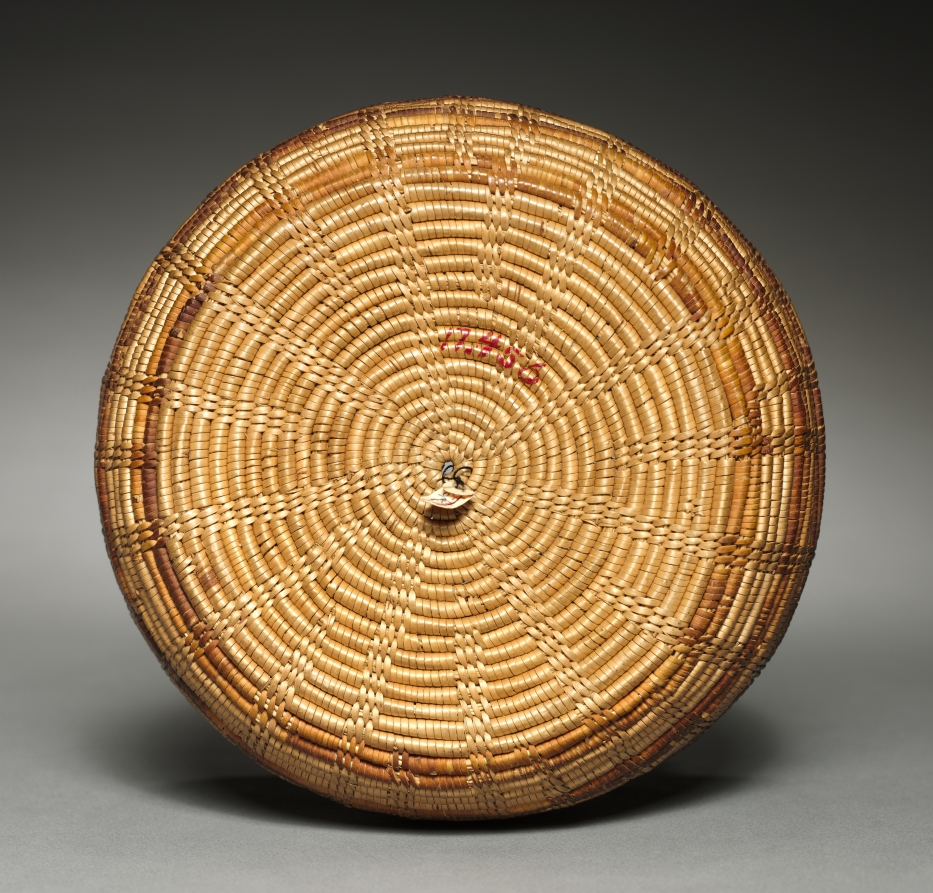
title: Jar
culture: California, Tübatulabal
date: 1895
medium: Sumac, yucca root; coiled, skip-stitch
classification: Basketry